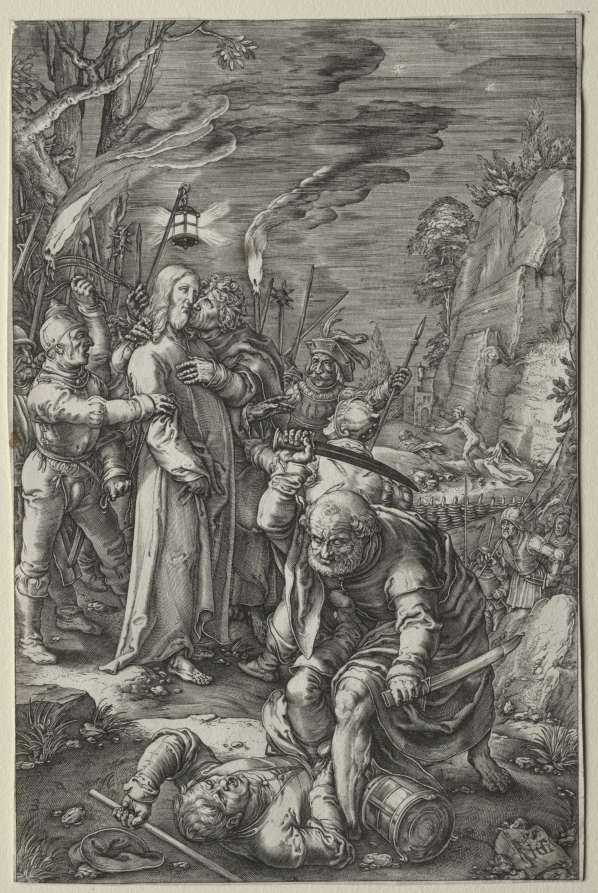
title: The Passion: The Betrayal of Christ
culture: Netherlands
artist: Hendrick Goltzius (Dutch, 1558–1617)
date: 1598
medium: engraving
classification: Print